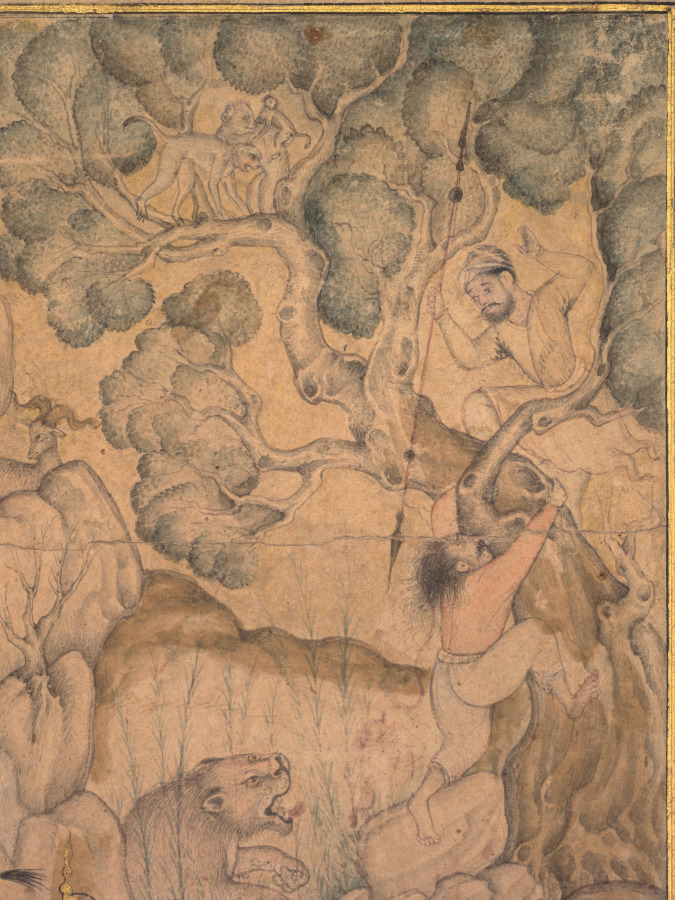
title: Princes hunting in a rocky landscape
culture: India, Mughal, 16th century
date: c. 1580–85; borders added c. 1700s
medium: Ink, slight color, and gold on paper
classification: Painting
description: The subdued palette of this tinted drawing belies the dire events of the scene. A group of Mughal nobles out hunting with falcons has chanced upon two lions in the wilderness, and one of the men has been attacked. The bearded figure with the falcon at the upper left and the huntsman about to retrieve a duck caught by one of the trained falcons at the lower left are reminiscent of an earlier work, Hunting with Falcons in a Landscape (CMA 2013.292), painted by a Persian artist. By the time this painting was made Akbar exerted more direct influence on his artists’ work, and it reveals his taste for dramatic action and climactic moments where life and death hang in the balance.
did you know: A hunter with gunpowder pouch hurriedly loads a musket with a scouring stick.